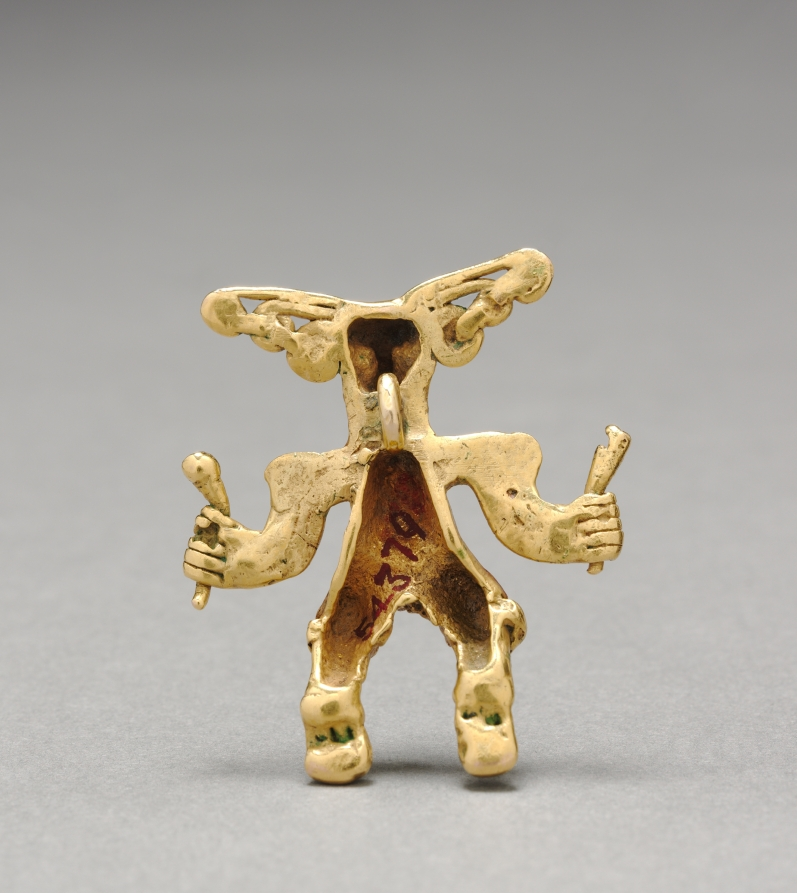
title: Figurine Pendant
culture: Western Panama, or Diquís, Costa Rica, Veraguas-Gran Chiriquí or Diquís Style, 11th-16th century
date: c. 1000–1550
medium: cast gold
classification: Metalwork